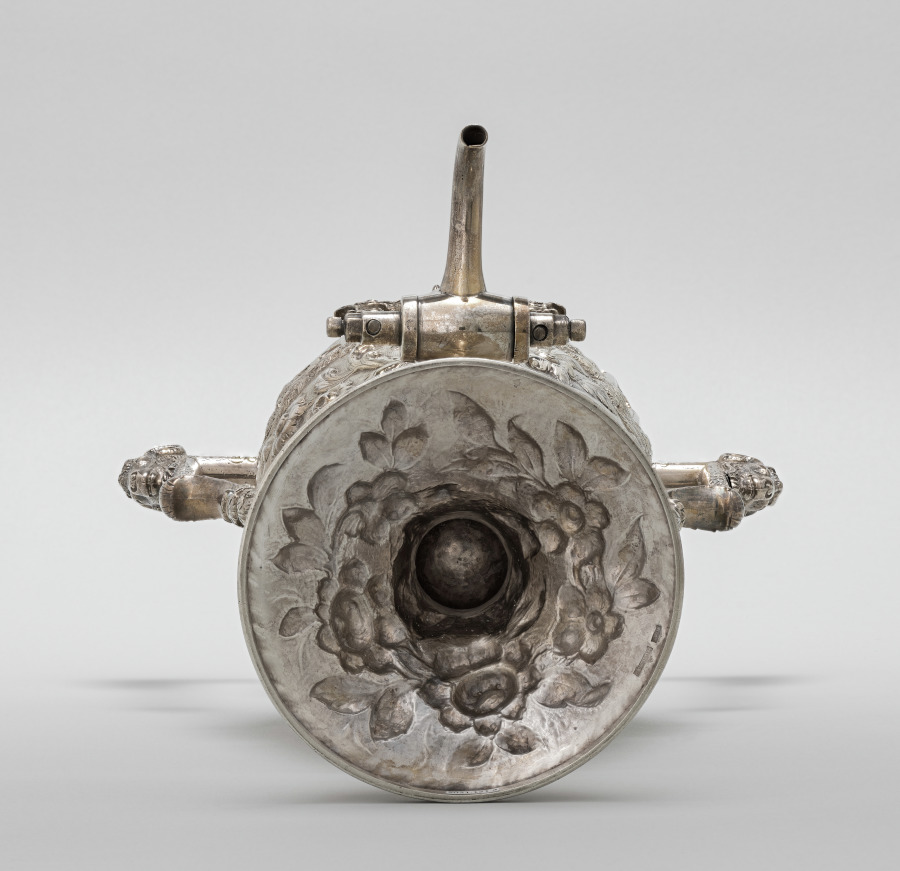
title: Coffee Urn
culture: America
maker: Samuel Kirk (American, 1793–1872)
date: c. 1843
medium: Silver, ivory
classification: Silver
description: Samuel Kirk was a leading American silversmith in the early 19th century whose Baltimore studio had became a major American silver company that thrived throughout the middle of the 20th century. Such a large, impressive coffee urn as this highly decorated example was considered the ultimate in Samuel Kirk silver and was largely made by hand.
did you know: The decoration on this coffee urn was achieved through a technique known as "repousse" in which the design was hammered into relief from behind.